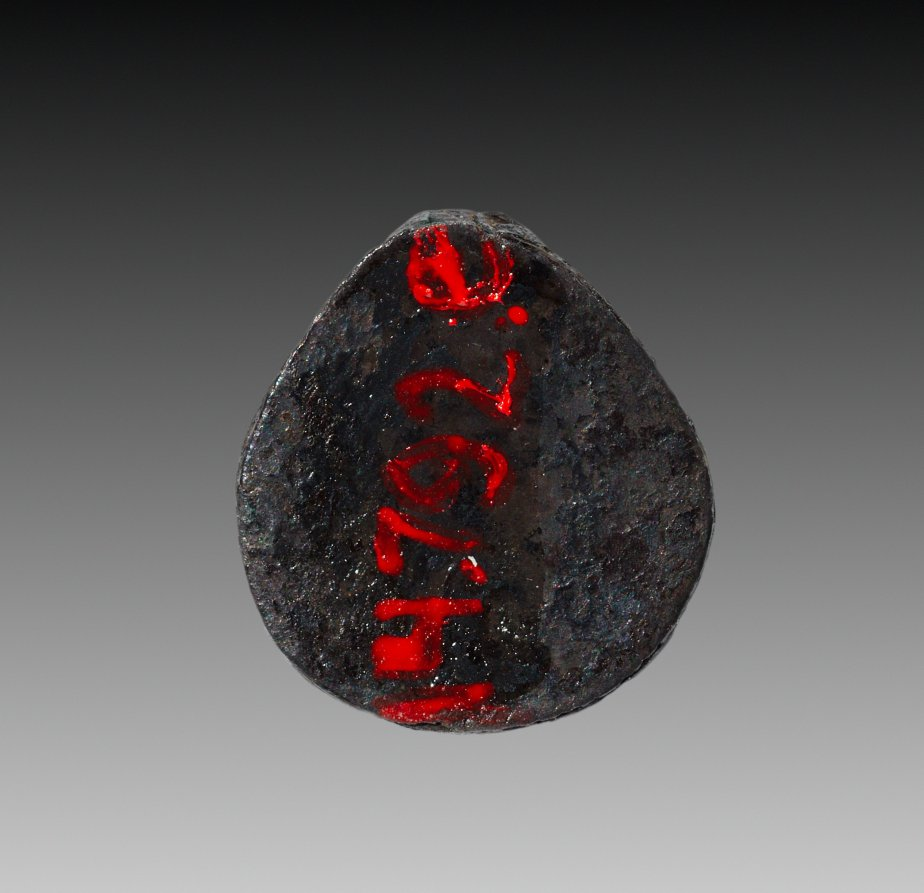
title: Oyster-Shell Pendant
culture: Egypt, Middle Kingdom (2040–1648 BCE), Dynasty 12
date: 1980–1801 BCE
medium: carnelian and silver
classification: Jewelry